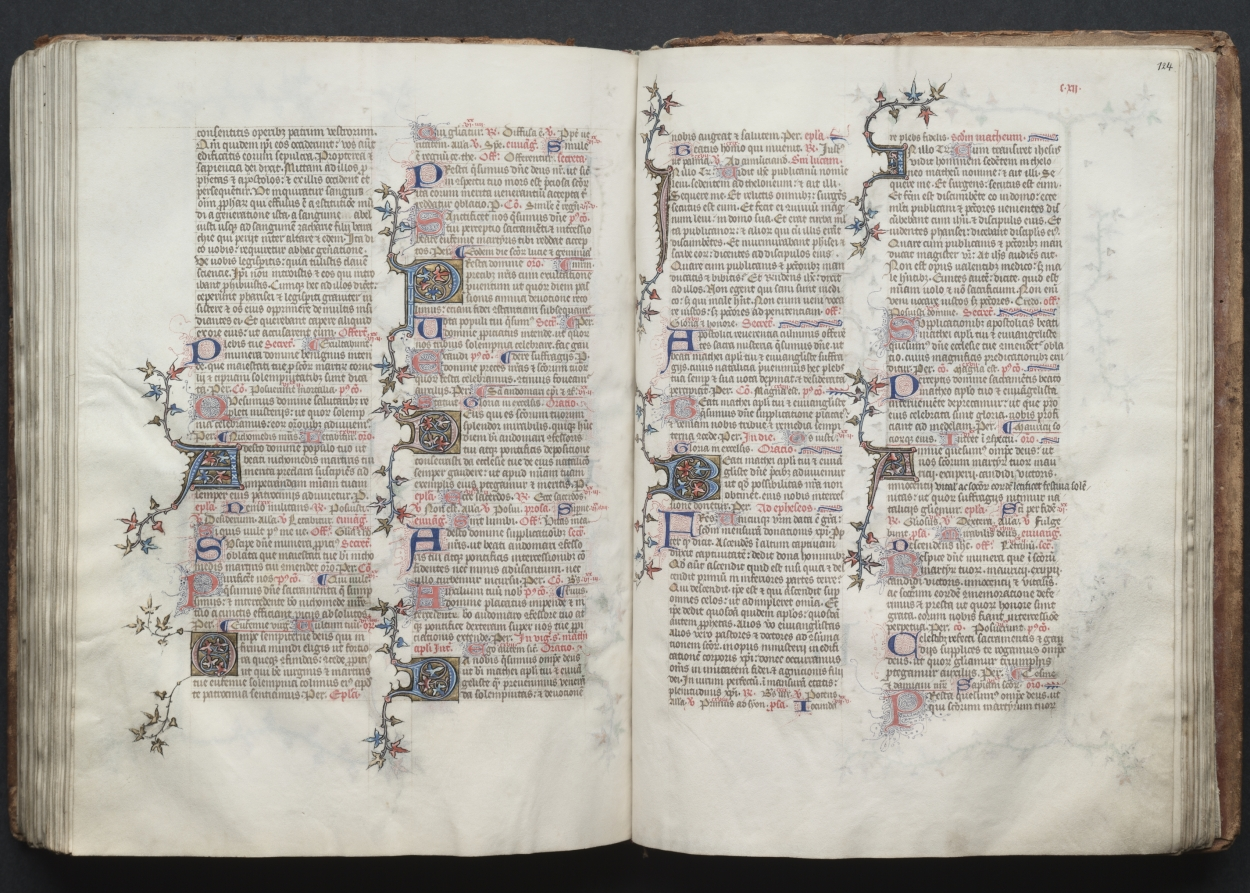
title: The Gotha Missal: Fol. 124r, Text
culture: France, Paris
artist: Master of the Boqueteaux (French)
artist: and Workshop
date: c. 1375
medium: ink, tempera, and gold on vellum; blind-tooled leather binding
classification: Bound Volume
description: The style and quality of this manuscript's decoration is typical of deluxe Parisian books made for aristocratic or royal patrons. Most of the book's decoration appears to be the work of the Master of the Boqueteaux, an artist active at the court of King Charles V (died 1380). His style was apparently shared by a number of book illuminators working in and around Paris. It is very possible that the Gotha Missal belonged to Charles V, but is not provable because the manuscript has no royal portraits and lacks a colophon. Given the book's magnificent decoration, however, it would seem that it was produced for a Valois prince, if not for the king himself. The manuscript receives its name from the German dukes of Gotha, its later owners.